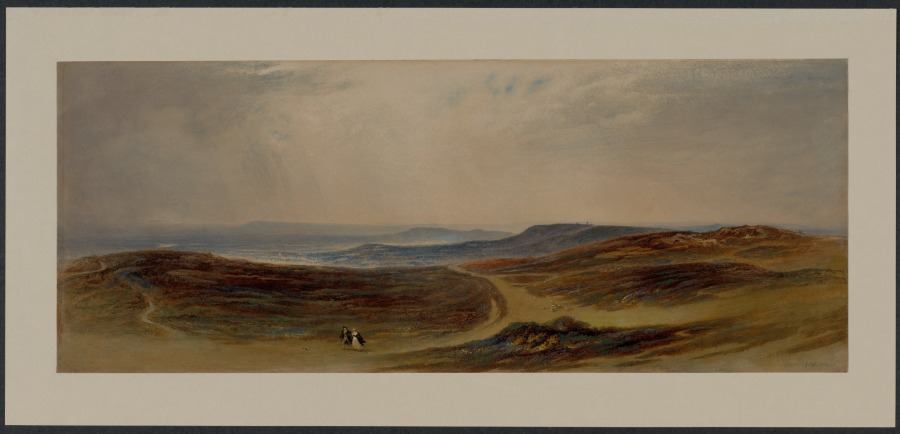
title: The Valley of the Tyne, My Native Country near Henshaw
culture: England, 19th century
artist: John Martin (British, 1789–1854)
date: 1842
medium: watercolor, gouache and gum arabic with graphite underdrawing, sanding, and scraping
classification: Drawing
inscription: signed, lower right, in watercolor: J. Martin / 1842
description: Panoramic landscapes in watercolor became an important source of income during John Martin’s late career. This work demonstrates his ability to convey monumentality on a small scale and to combine broad washes of color with meticulous detail. The sweeping vista in this drawing describes the fertile valley of the River Tyne, known for its forests, flora, and fauna. Curving arcs of slopes and plains swirl around the composition. A tiny couple and dog rush through the vast landscape beneath ominous storm clouds.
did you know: The setting of this watercolor is John Martin's native Northumberland, to which he was deeply attached and described having spent time there "exulting in the sublime grandeur of the surrounding beauties of nature."